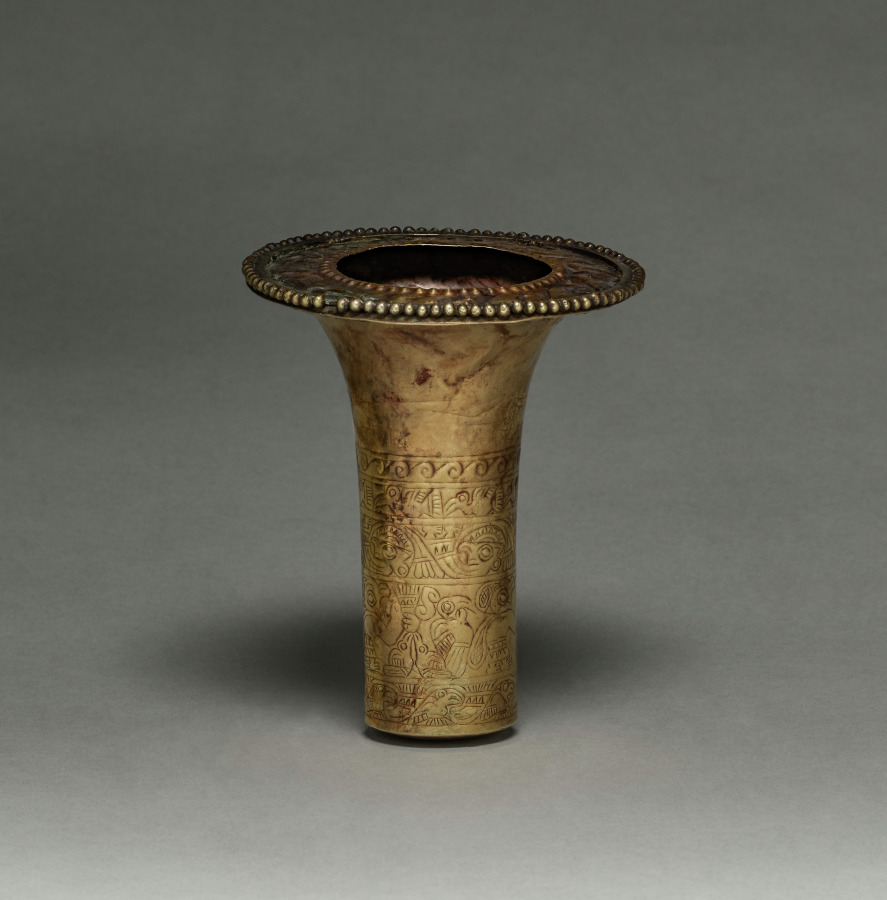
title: Ear Flare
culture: Peru, North Coast, Chimú style (900-1470)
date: 900–1470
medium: hammered gold alloy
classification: Metalwork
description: North Coast ear ornaments typically have a long shaft that balanced the weight of the glorious frontal. This pair illustrates Chimú interest in the sea, which had great economic and religious importance. On the shafts are bands of seabirds and waves, and a similar pattern edges the frontals, which were altered in modern times. Originally solid disks, the frontals' centers were cut out and a dotted band was added to the rim.